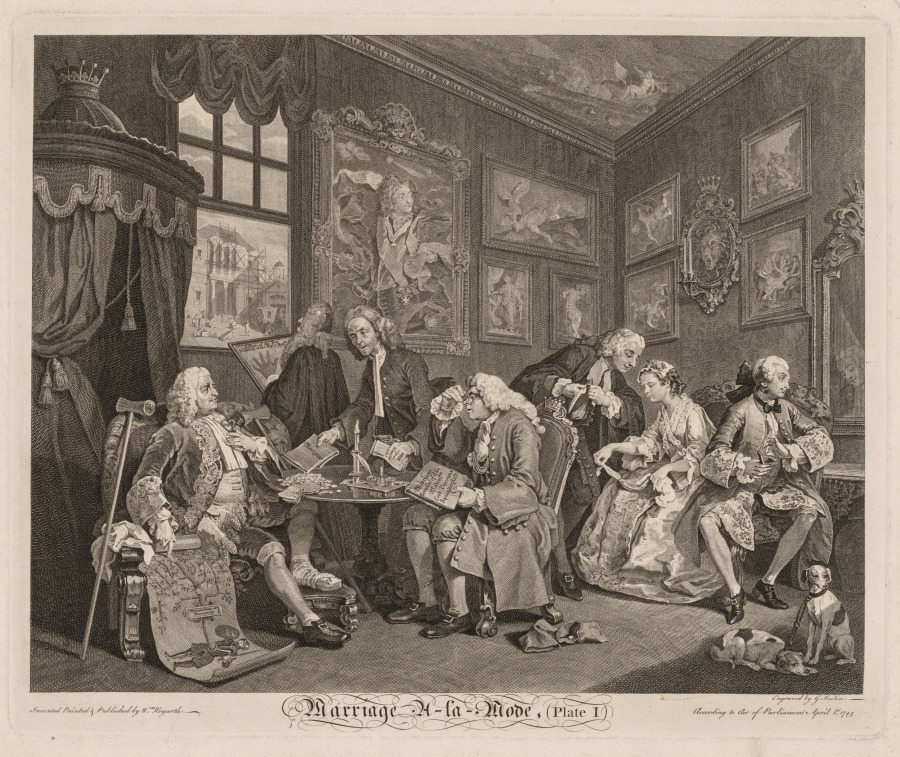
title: Marriage à la Mode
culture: England, 18th century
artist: William Hogarth (British, 1697–1764)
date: 1745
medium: engraving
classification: Portfolio